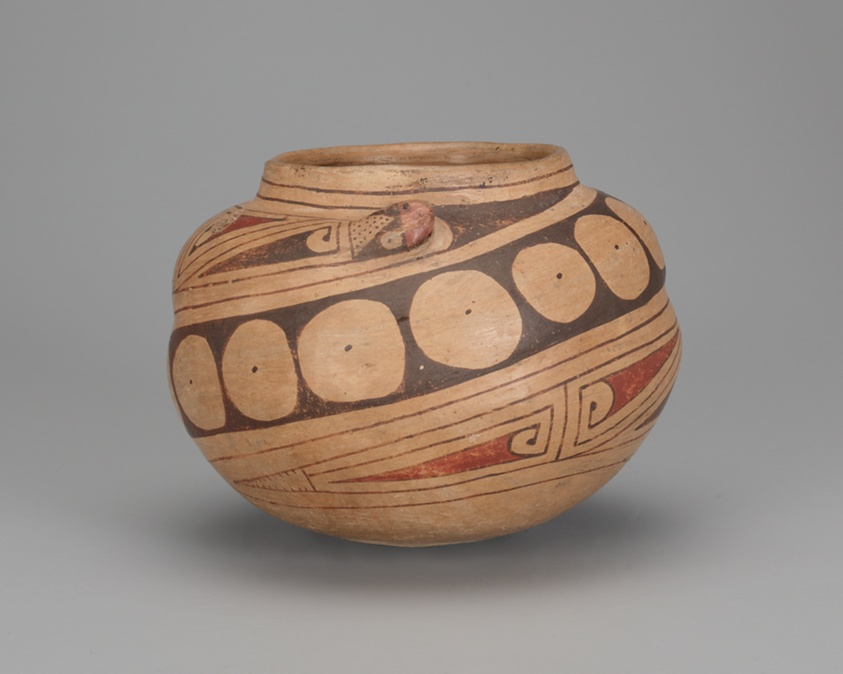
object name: Vessel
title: Storage Vessel with Snake Relief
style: casas grandes, americas, Arts of the Americas, native american, native north american, southwest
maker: Ceramist unknown (Casas Grandes); New Mexico, United States, or Chihuahua, Mexico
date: 1280–1450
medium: Ceramic and pigment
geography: New Mexico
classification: vessel; art of the americas; ceramics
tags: animals, owls, snakes, snake